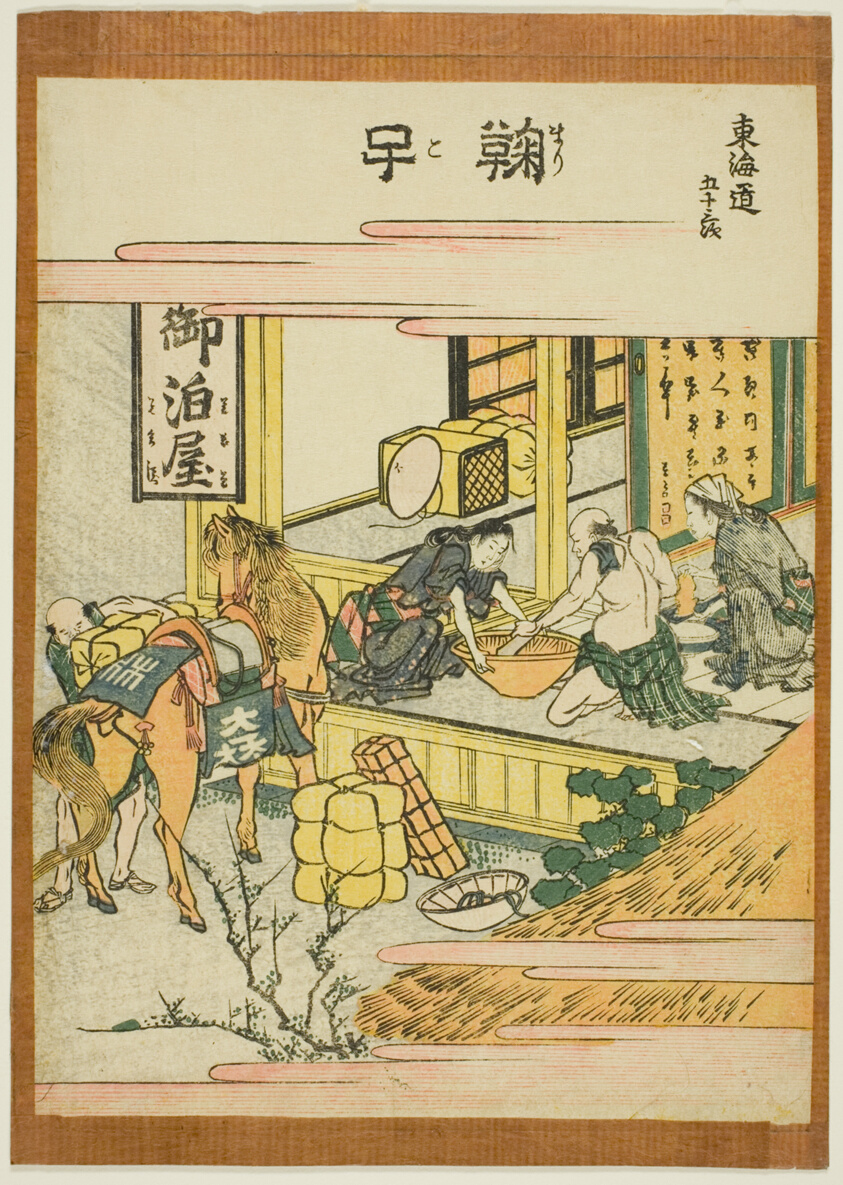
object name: Print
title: Mariko, from the series "Fifty-three Stations of the Tokaido (Tokaido gojusan tsugi)"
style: Japanese (culture or style)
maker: Katsushika Hokusai 葛飾 北斎; Japanese, 1760-1849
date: c. 1806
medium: Color woodblock print; chuban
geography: Japan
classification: woodblock print; print; asian art